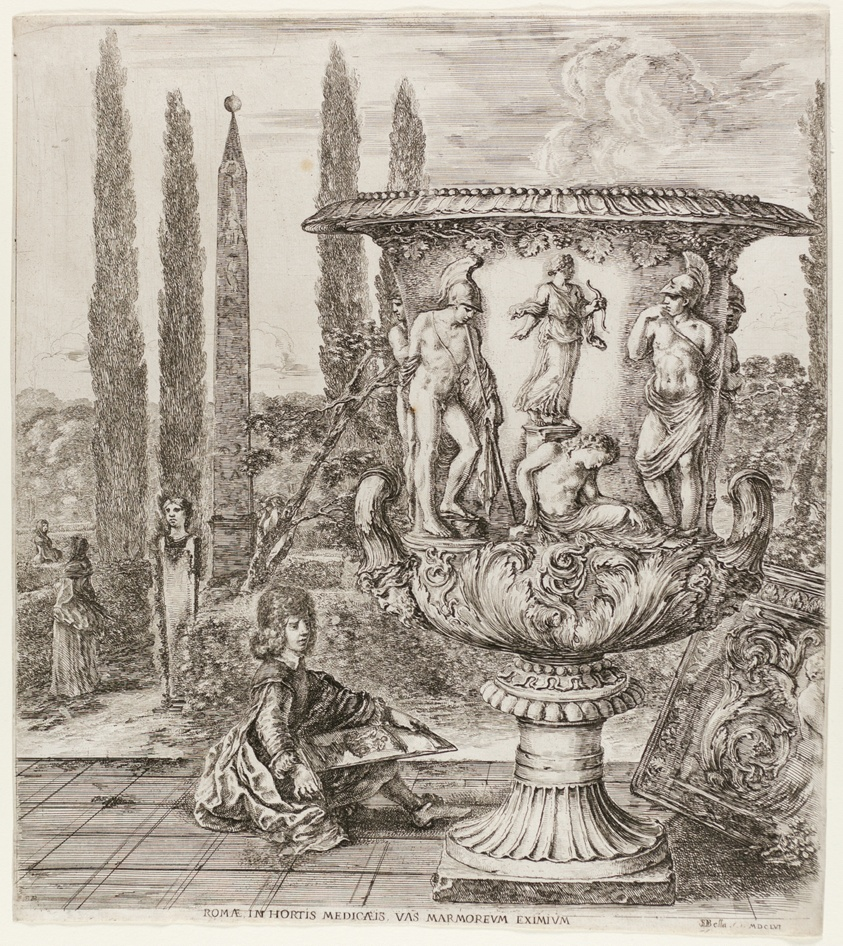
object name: Print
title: The Medici Vase, plate one from The Six Large Views of Rome and the Campagna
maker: Stefano della Bella (Italian, 1610-1664)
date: 1656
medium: Etching and engraving on ivory laid paper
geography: Italy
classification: etching; print; prints and drawing